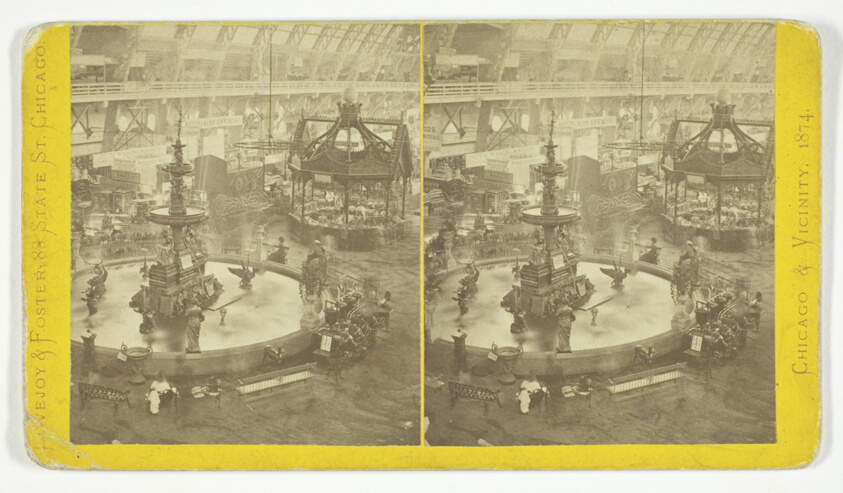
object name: Photograph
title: Untitled, from the series "Chicago and Vicinity"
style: 19th century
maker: Lovejoy & Foster; American, active 1870s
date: 1874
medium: Toned gelatin silver print, stereo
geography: Chicago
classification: photography; photograph; albumen silver print; stereograph (albumen)